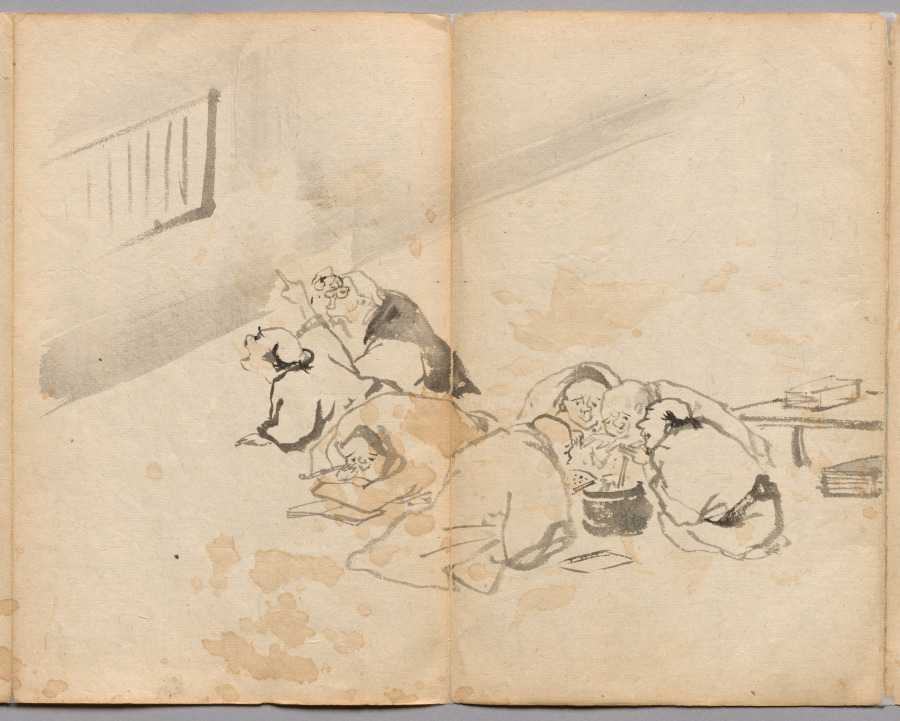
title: People Dining and Reading from Sketch Album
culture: Japan, Edo period (1615–1868) to Meiji period (1868–1912)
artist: Kawanabe Kyōsai (Japanese, 1831–1889)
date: mid- to late 1800s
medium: Accordion-style book of 26 double-leaves; ink and color on paper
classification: Bound Volume